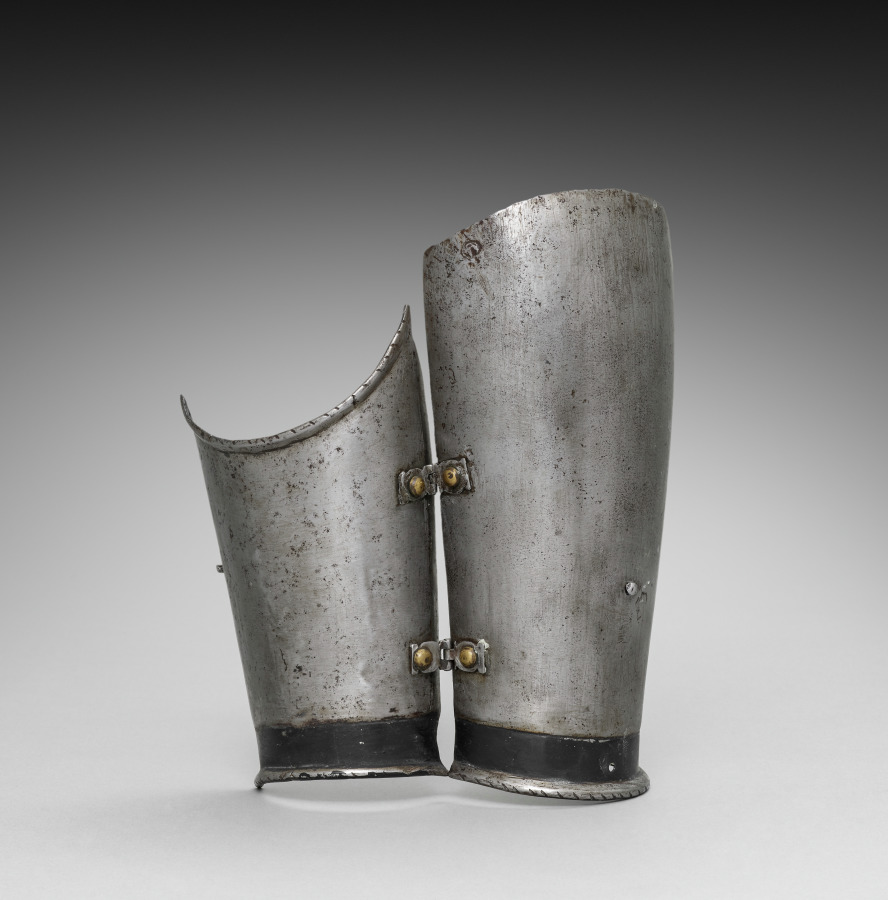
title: Left Vambrace (lower cannon)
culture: Germany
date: c.1550–1570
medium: iron, steel, leather and brass rivets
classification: Arms and Armor